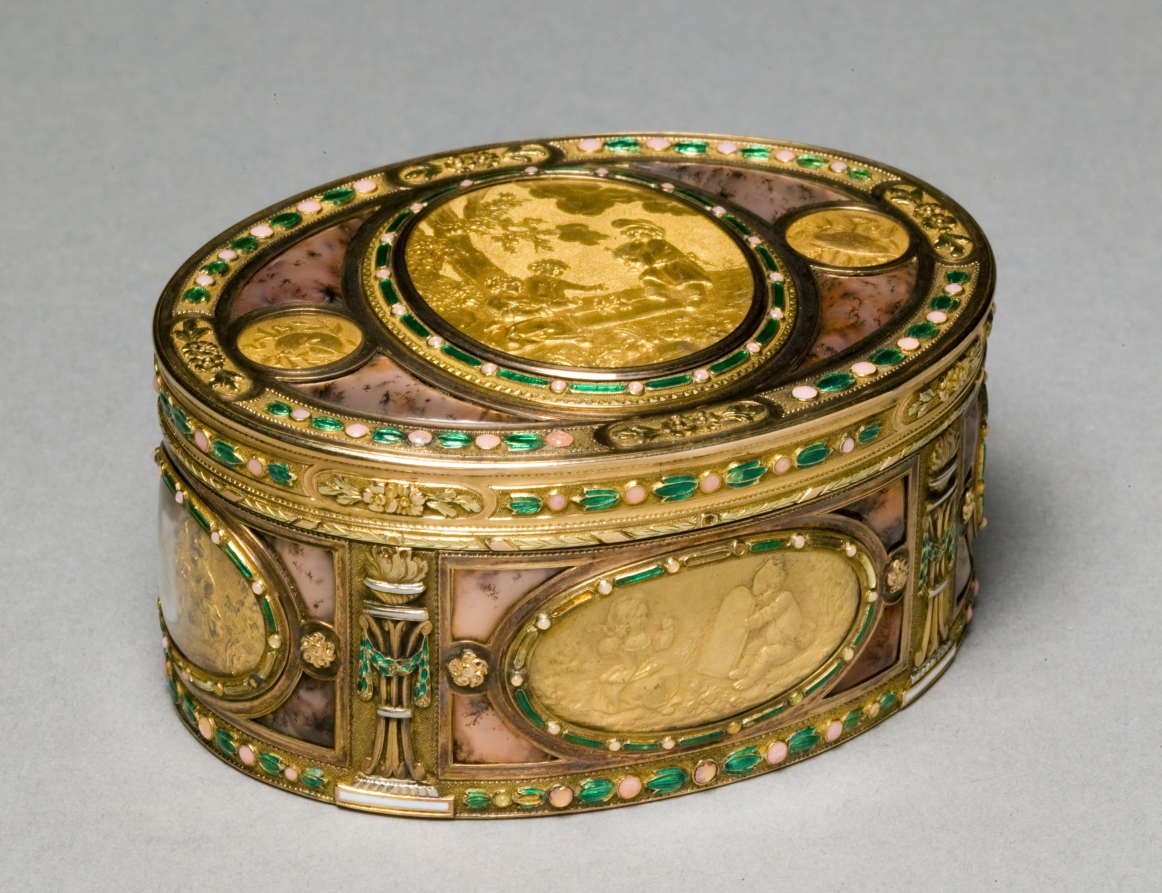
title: Snuff Box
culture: France, Paris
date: c. 1880–1900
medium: gold, enamel, agate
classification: Miscellaneous